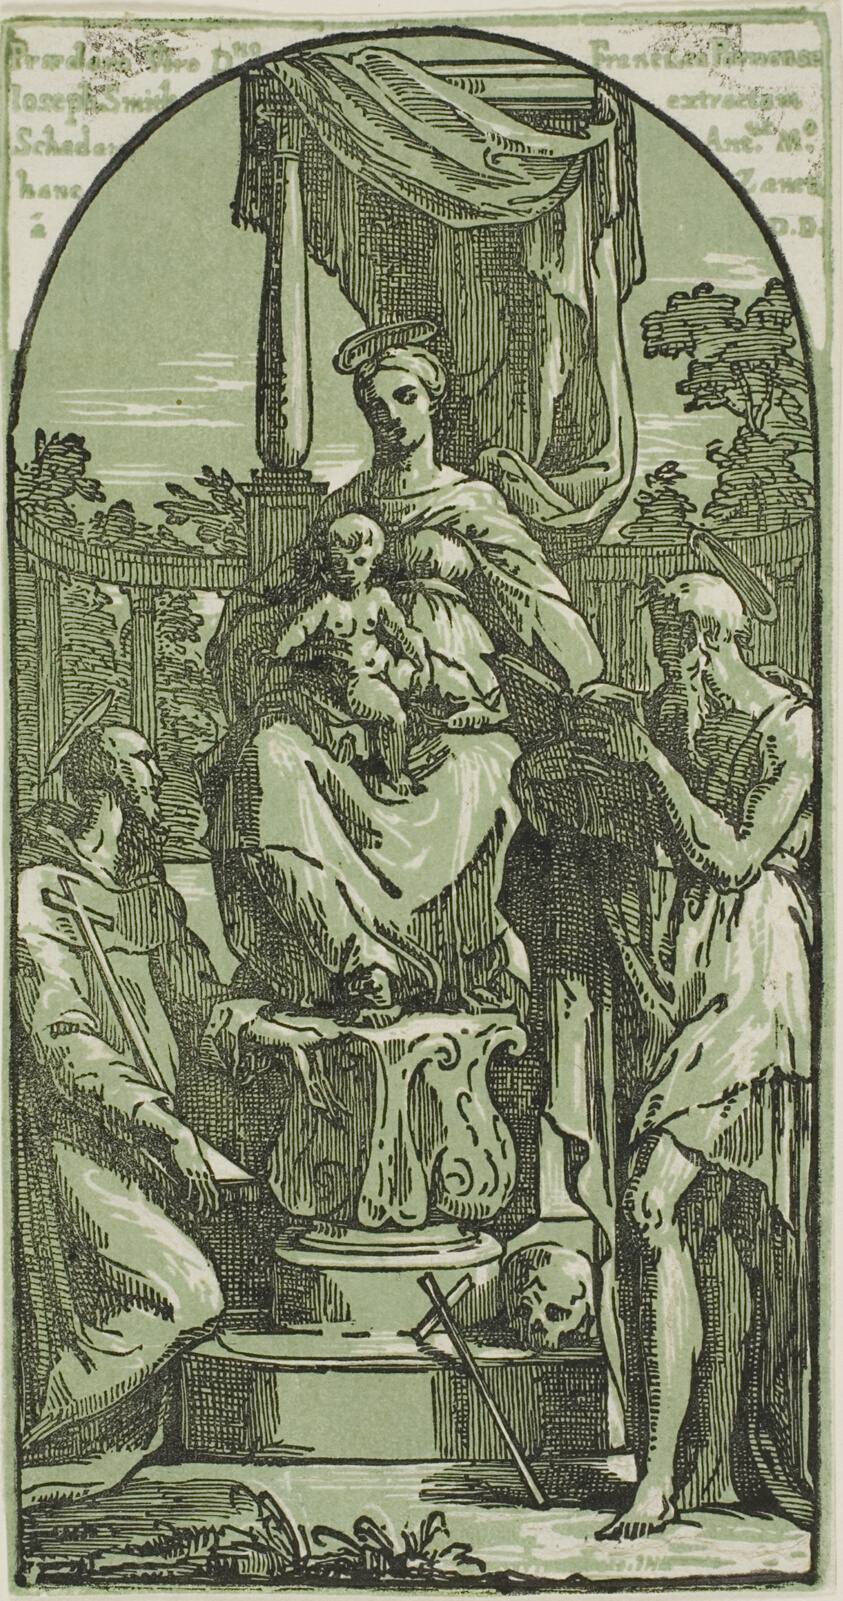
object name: Print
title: Madonna and Child Enthroned, St. Jerome and St. Francis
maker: Conte Anton Maria Zanetti; Italian, 1680–1767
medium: Chiaroscuro woodcut in black and light green on off-white laid paper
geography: Italy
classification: woodcut; print; prints and drawing